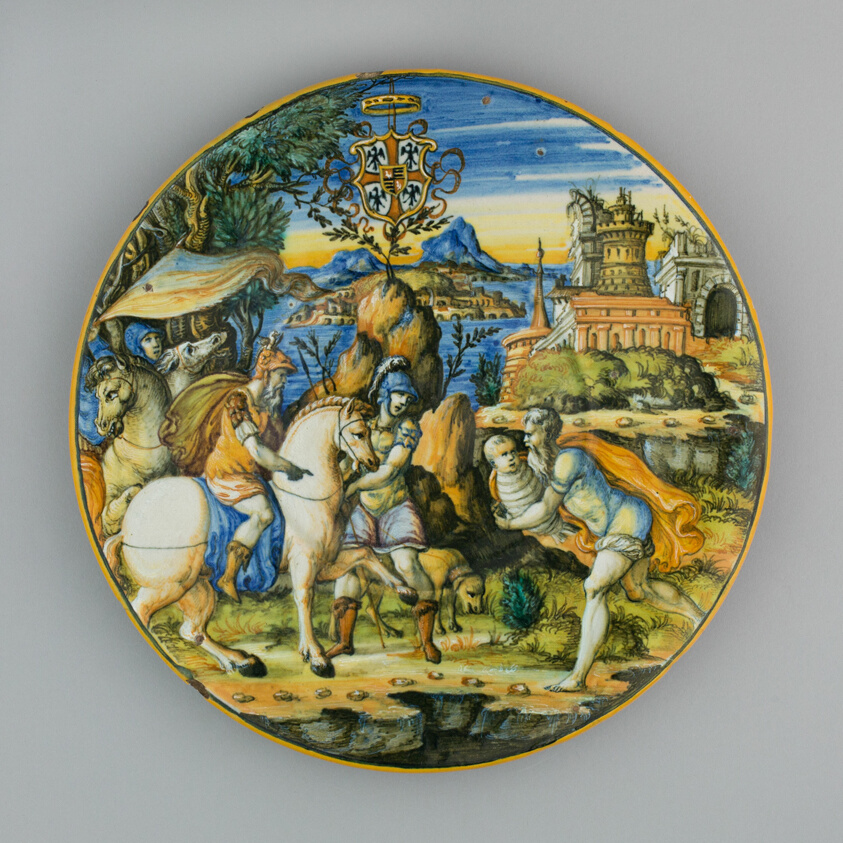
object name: Ceramics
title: Plate with Story of Numa Pompilius and Arms of Gonzaga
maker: Fontana Workshops; Italian; Urbino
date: c. 1560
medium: Tin-glazed earthenware (maiolica)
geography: Urbino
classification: earthenware; european decorative arts; ceramics; decorative arts